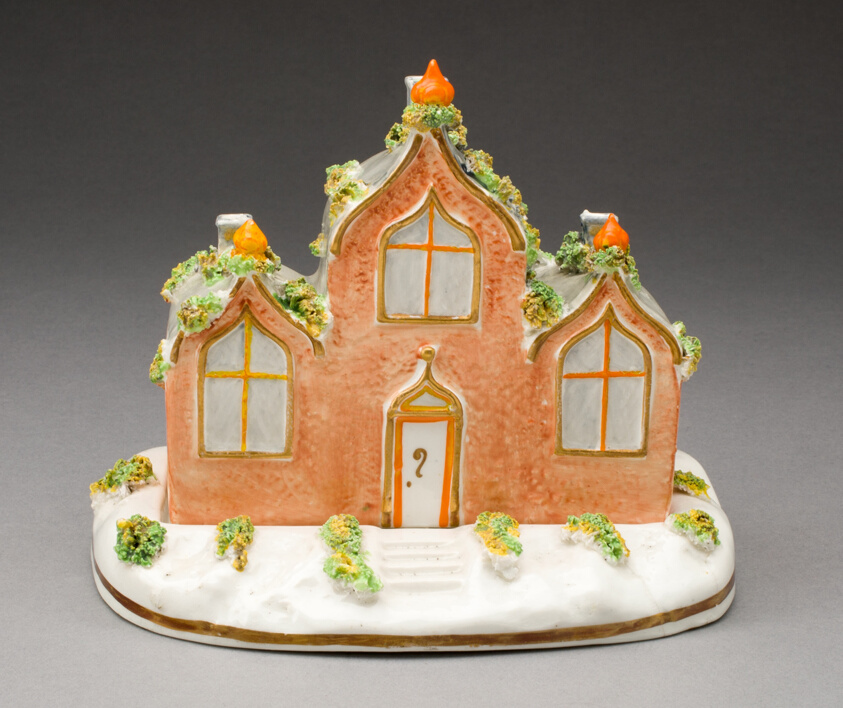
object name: Ceramics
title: Incense Burner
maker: England, Staffordshire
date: c. 1830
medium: Glazed earthenware with polychrome enamel decoration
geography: Staffordshire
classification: earthenware; european decorative arts; ceramics